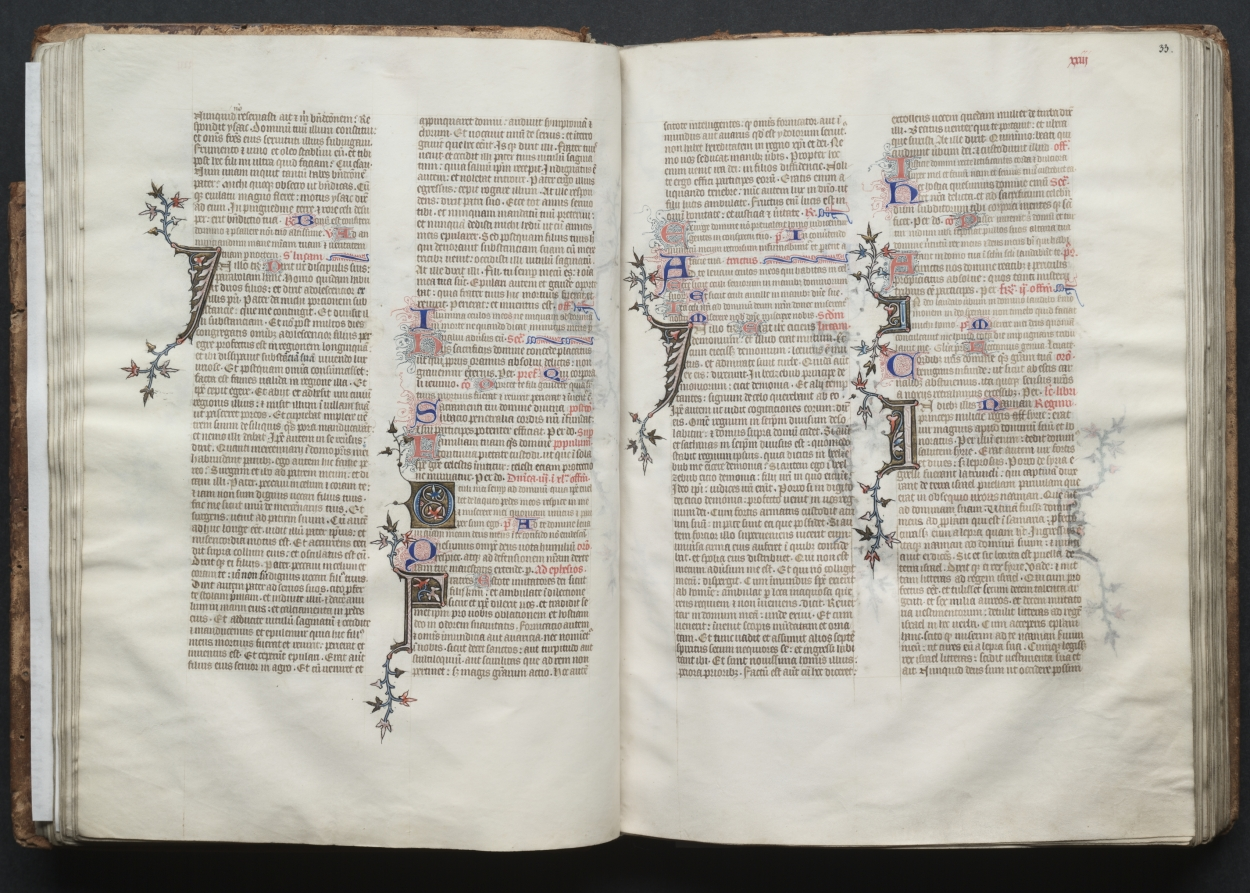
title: The Gotha Missal: Fol. 32v, Text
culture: France, Paris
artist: Master of the Boqueteaux (French)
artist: and Workshop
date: c. 1375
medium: ink, tempera, and gold on vellum; blind-tooled leather binding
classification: Bound Volume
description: The style and quality of this manuscript's decoration is typical of deluxe Parisian books made for aristocratic or royal patrons. Most of the book's decoration appears to be the work of the Master of the Boqueteaux, an artist active at the court of King Charles V (died 1380). His style was apparently shared by a number of book illuminators working in and around Paris. It is very possible that the Gotha Missal belonged to Charles V, but is not provable because the manuscript has no royal portraits and lacks a colophon. Given the book's magnificent decoration, however, it would seem that it was produced for a Valois prince, if not for the king himself. The manuscript receives its name from the German dukes of Gotha, its later owners.